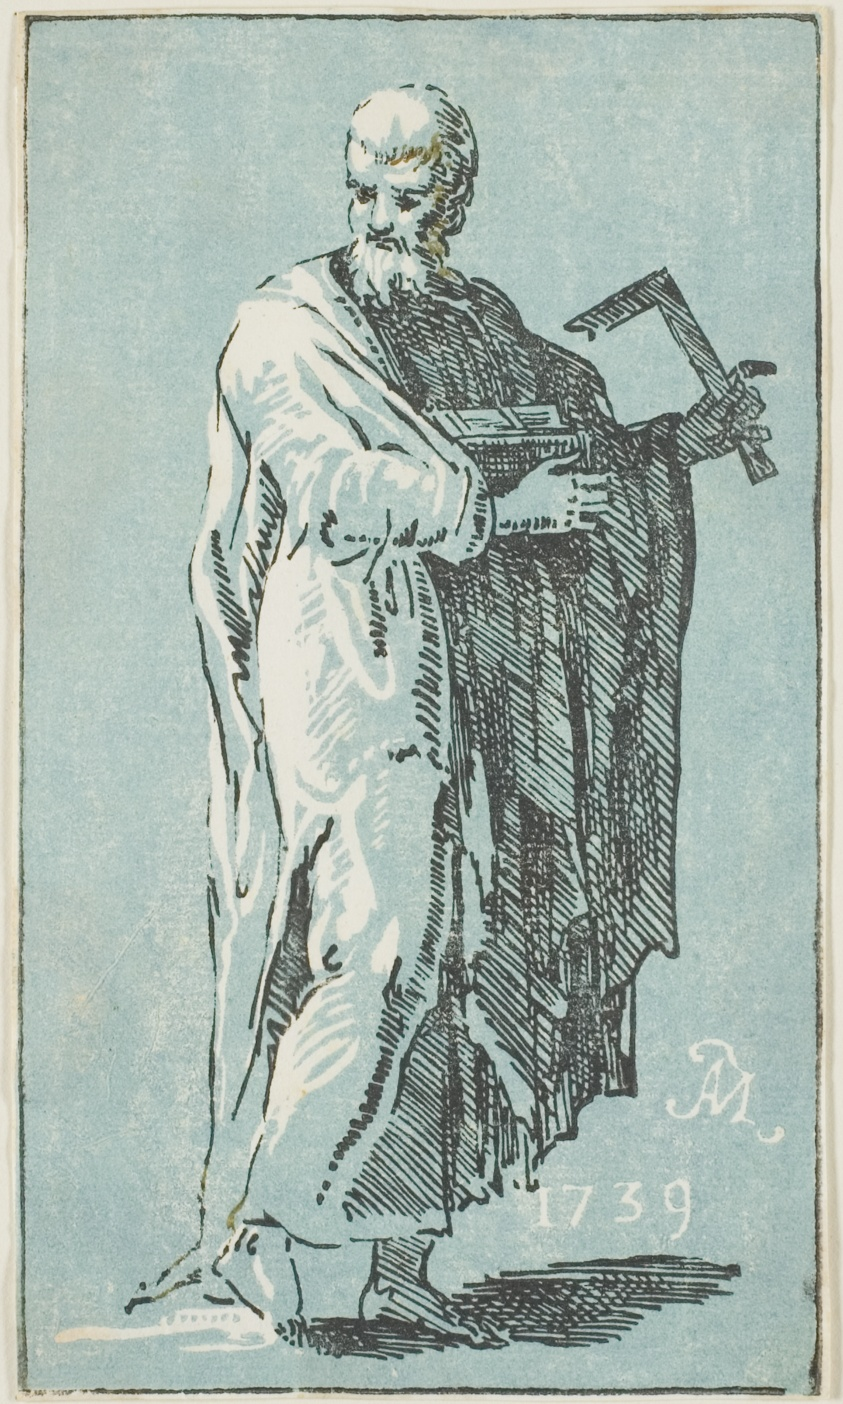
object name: Print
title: St. James Minor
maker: Conte Anton Maria Zanetti; Italian, 1680–1767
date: 1739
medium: Chiaroscuro woodcut in black, blue and brown on ivory laid paper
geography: Italy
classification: woodcut; print; prints and drawing